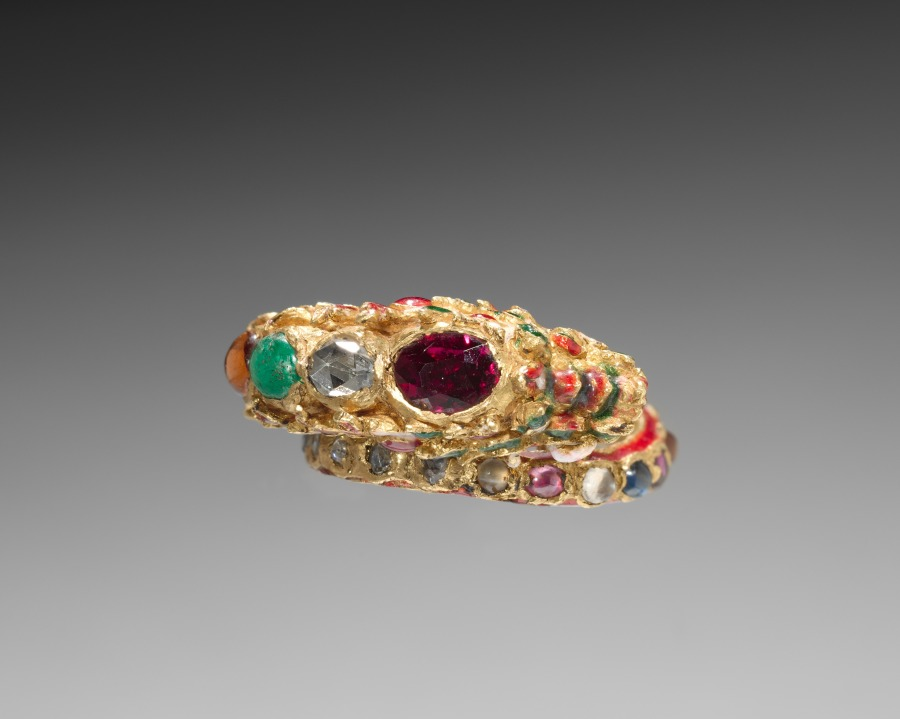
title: Ring in the Form of a Dragon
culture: India (?), Burma (?), Malay (?)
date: 18th Century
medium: gold, enamel and gems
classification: Jewelry